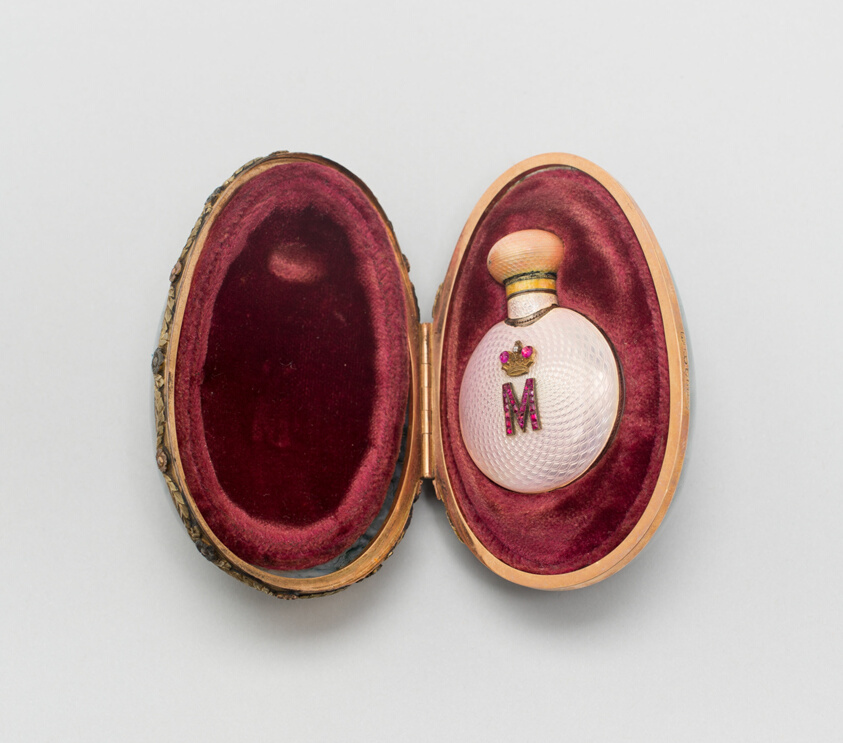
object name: Metalwork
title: Miniature Easter Egg with Scent Bottle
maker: Fabergé Workshop; Saint Petersburg, Russia, 1842-1917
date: Before 1899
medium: Moss agate, gold, enamel, and cabochon rubies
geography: Saint Petersburg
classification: stone; miniature; european decorative arts; metalwork